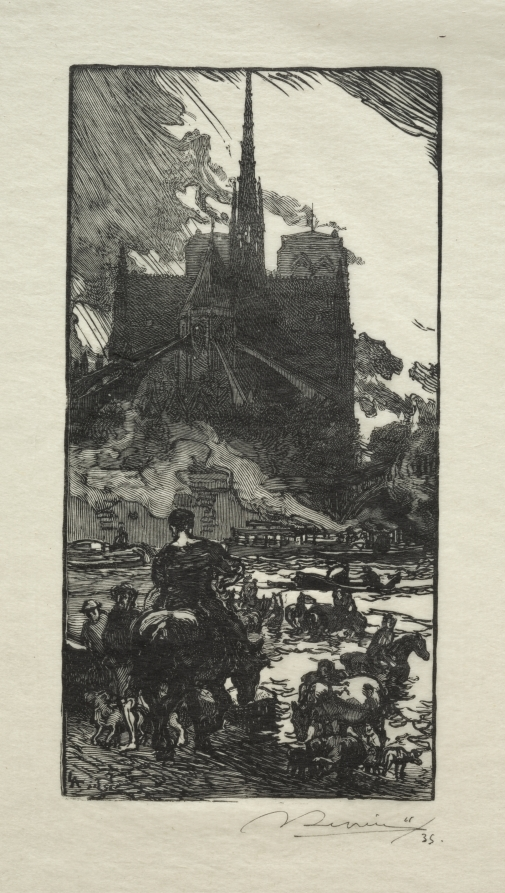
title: L'Abreuvoir au Point St. Louis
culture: France, 19th-20th century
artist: Auguste Louis Lepère (French, 1849–1918)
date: 1902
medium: wood engraving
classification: Print